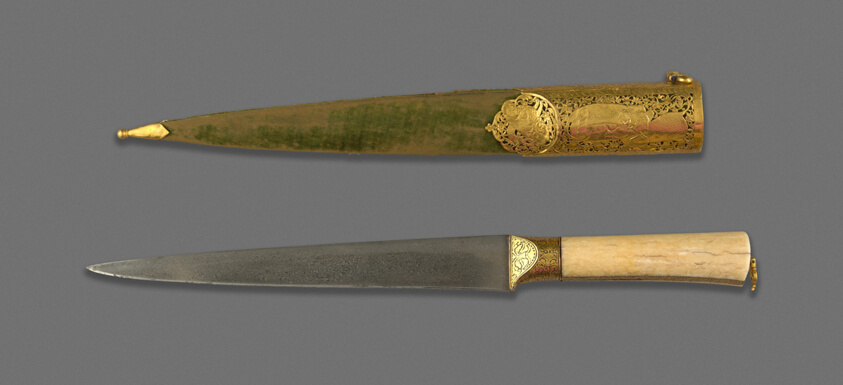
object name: Armor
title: Knife (Kard) with Battling Elephants, Rhinoceros and Lions on the sheath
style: South Asian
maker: India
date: 18th century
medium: Watered steel, ivory, and pierced and chased gold, wood and velvet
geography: India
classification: edged weapon-sword; armor